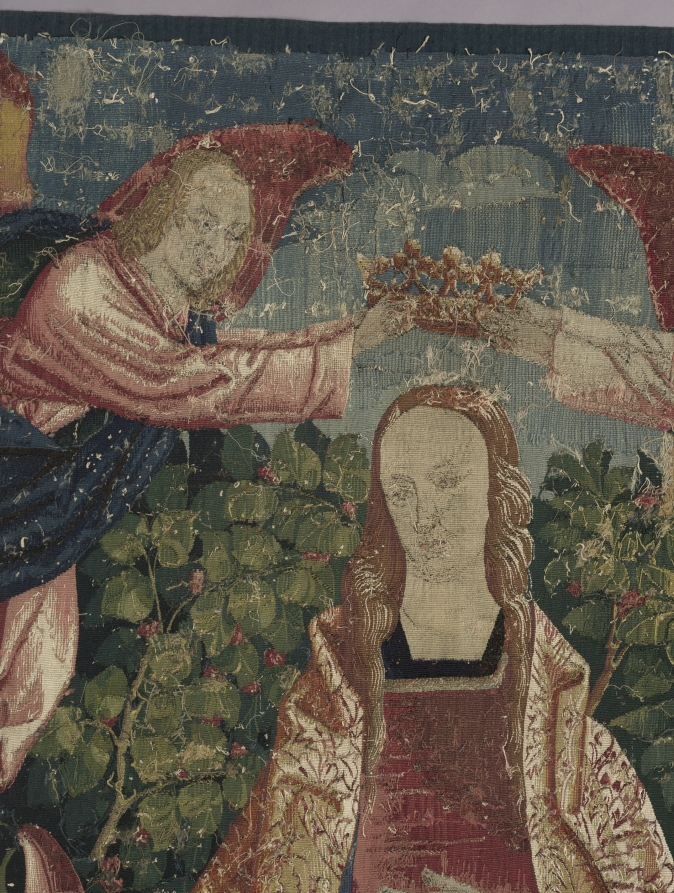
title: The Triumph of Eternity (from Chateau de Chaumont set)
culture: France, Lyon(?), early 16th century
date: 1512–15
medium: silk and wool; tapestry weave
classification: Tapestry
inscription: French verse in Gothic letters translates as follows: "Nothing triumphs by right authority, Unless it be conducted by Eternity. Nothing is permanent beneath the firmament, But above us triumphs Eternity."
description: The Triumph of Eternity is represented by the Coronation of the Virgin. Dressed in crimson velvet with an opulent brocaded velvet shawl, the Virgin is seated in the center as two angels hold a crown over her head. Five musical angels surround her playing an organ, recorder, straight cornetto, harp, and lute, while another sings from an open music book. The scenes in the set display a conservative style in which the figures are placed in shallow landscapes, thereby ignoring pictorial innovations for depicting space and mass. The verse in Old French at the top states: Nothing triumphing by due authority Remains permanent and durable. Nothing is permanent under the heavens, But above, eternity triumphs.